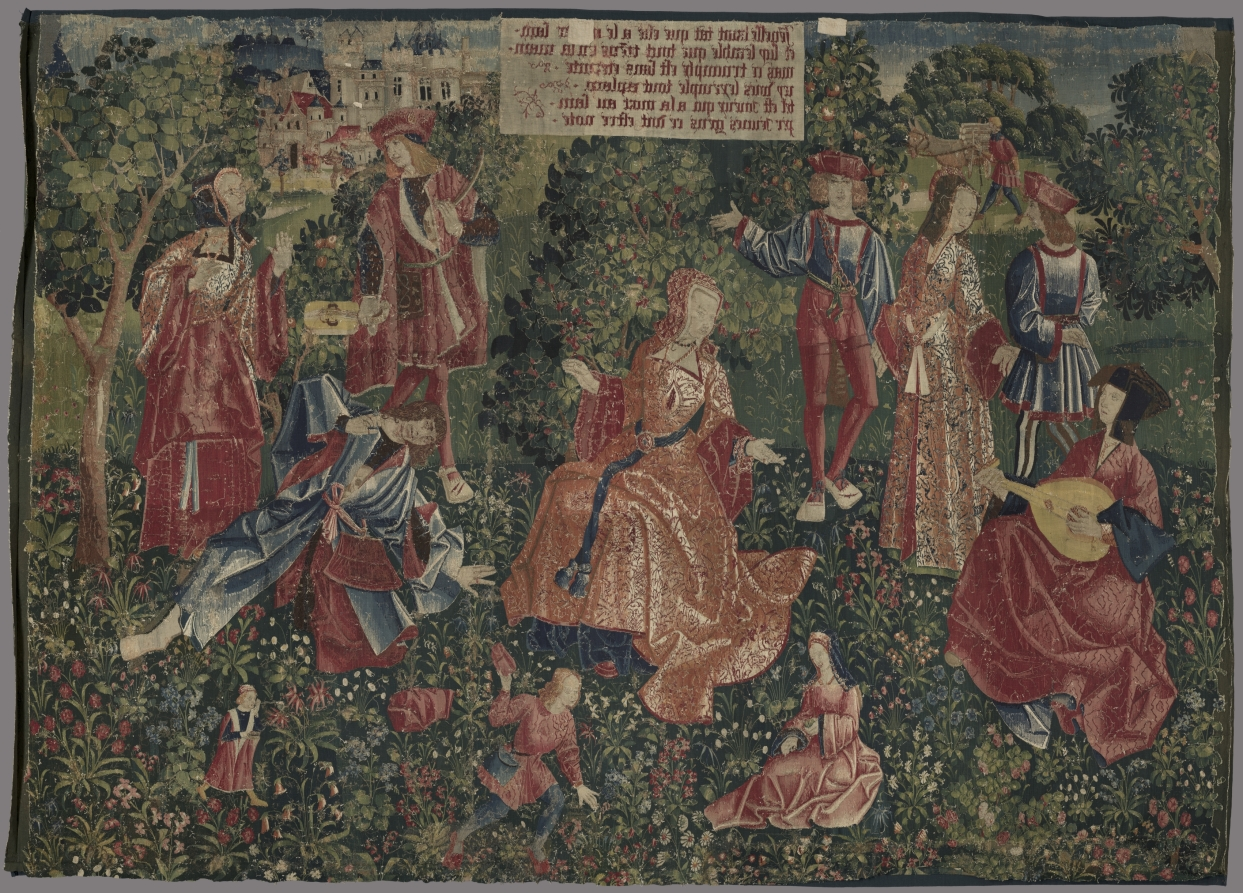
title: Youth (from Chateau de Chaumont set)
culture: France, Lyon(?), early 16th century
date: 1512–15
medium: silk and wool; tapestry weave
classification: Tapestry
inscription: French verse in Gothic letters translates as follows: Youth triumphs while its heart is healthy, And when it seems to hold all in its hand. But this triumph is without eternity. Here one sees the example full well: Those who are happy hide death in thier heart. Let the young heed this warning.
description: Louise of Savoy (1476-1531), queen mother of King Francis I, is depicted here in a sumptuous brocaded velvet in the center. She addresses youthful figures including Éléonore, Pierre Sala’s daughter who is facing her future husband, Hector. On the right, King Louis XII (died 1514) stands in front of the Chateau Langais where he had married Anne of Brittany. Above is Hector’s deceased father with a partially concealed skull under his robe, while a woman expresses surprise at the sight. The verse in Old French at the top states that youthful happiness is not eternal: Youth makes sounds as long as its heart is healthy, And thinks that it holds all in its hand. But this triumph is not eternal. Here you see clearly an example: He that is happy has death in his breast. Of this you people should take note.